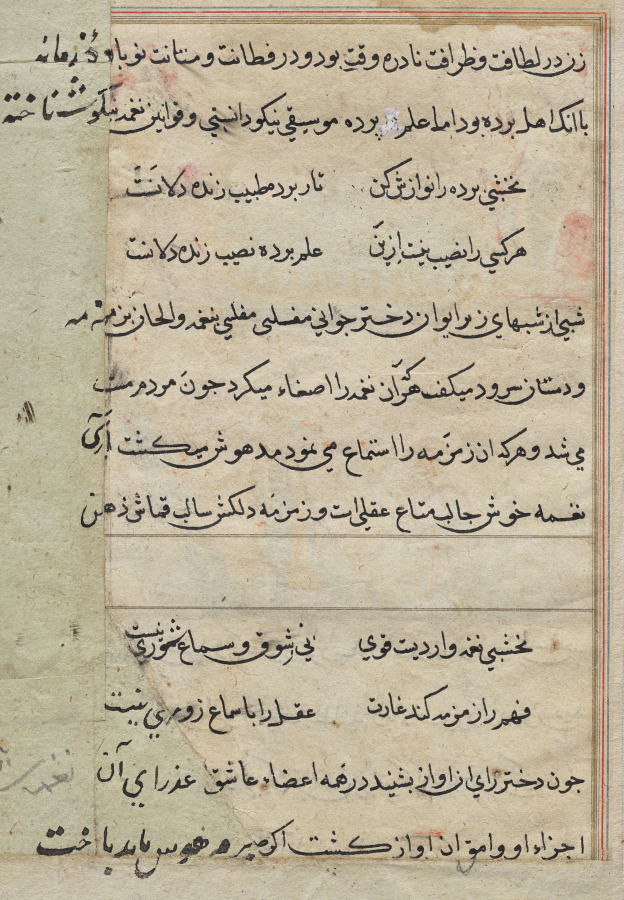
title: Page from Tales of a Parrot (Tuti-nama): text page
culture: Mughal India, court of Akbar (reigned 1556–1605)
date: c. 1560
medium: gum tempera, ink, and gold on paper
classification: Painting